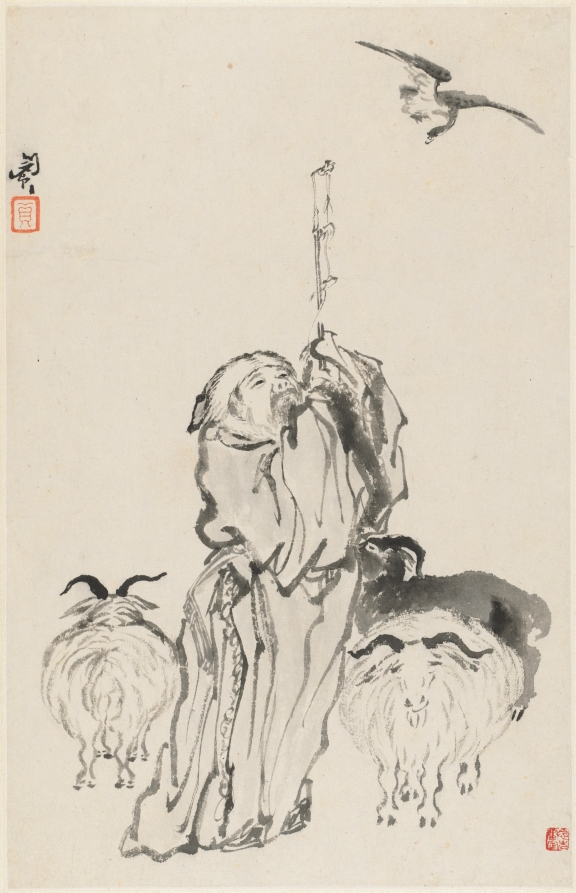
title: Su Wu the Shepherd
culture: China, Qing dynasty (1644-1911)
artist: Min Zhen (Chinese, 1730–after 1788)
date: 1788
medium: album leaf, ink on paper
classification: Painting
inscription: Inscription by Min Chen on the last leaf: I have a habit of collecting strange rocks. My friend Tai-li shan-jen* treasures my paintings as much as I treasure strange rocks. Once we agreed to exchange what we love with each other. However, my busy activities have kept me from carrying this out. This summer I realized that this strange rock has been sitting in my studio for five years, so I painted this to fulfill my old promise. As a record, I chose the grotesque cliff in the last scene of this twelve-leaf album. Cheng-chai, Min Chen inscribed this on the sixth day of the sixth month [July 9] of the wu-shen year [1788]. * Tai-li shan-jen is Wang Li [tzu: Li-fu] tr. Hou-mei Ishida Six seals appearing on the leaves: Min Chen, Cheng-chai, Ching-ch'iao, Chen, Liao-t'ang, Min Chen chih-yin.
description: Min Zhen, who was orphaned at age 12 and developed an eccentric personality, was trained by Tang Yin (1682–1756), a writer, playwright, and superintendent of the imperial porcelain workshops in Jingdezhen. The connection to him may have enabled Min to stay in Beijing for a decade from around 1773. It is not clear whether he ever resided in Yangzhou, but his style is in many instances reminiscent of that of Yangzhou artist Huang Shen. This album demonstrates Min’s versatility and mature style in the last years of his life.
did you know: Su Wu 蘇武 (140-60 BC) endured hardships and became a humble shepherd in an alien land while remaining a loyal servitor of the Han dynasty.